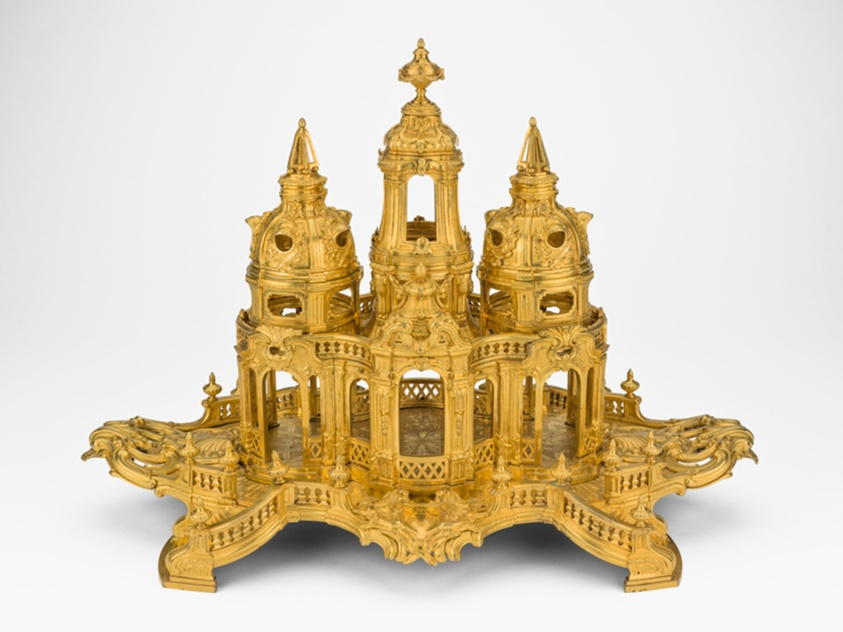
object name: Metalwork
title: Table Centerpiece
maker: Denis René Gastecloux; French, active mid-18th century; London, England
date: 1768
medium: Gilt bronze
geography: London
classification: decorative object/ornament; tableware; bronze; european decorative arts; metalwork